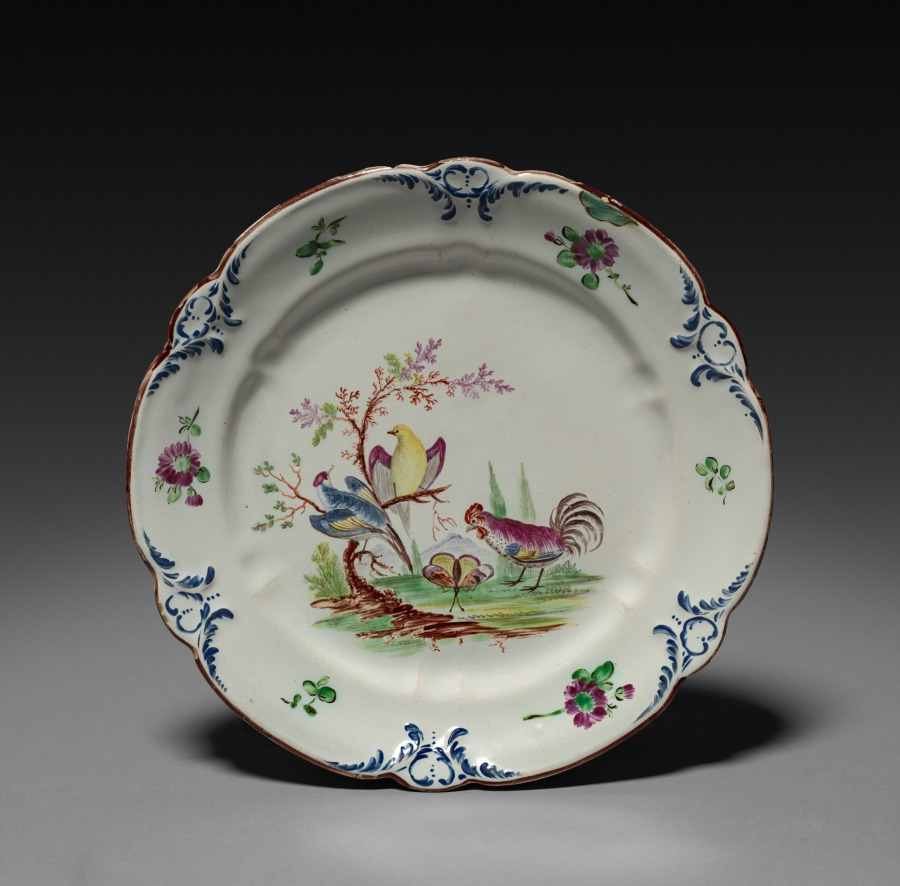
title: Plate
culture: France, 18th century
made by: Rouen Factory (French)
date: c. 1775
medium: faience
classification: Ceramic